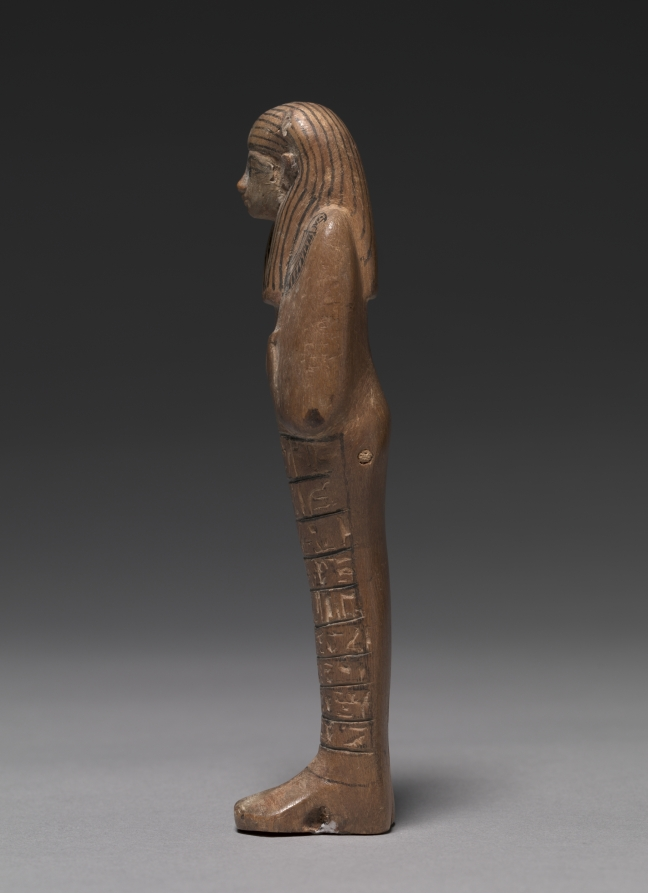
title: Shawabty of Tashery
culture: Egypt, New Kingdom (1540–1069 BCE), Dynasty 18, reign of Amenhotep III (1390–1352 BCE)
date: c. 1391–1353 BCE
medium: painted tamarisk?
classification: Funerary Equipment